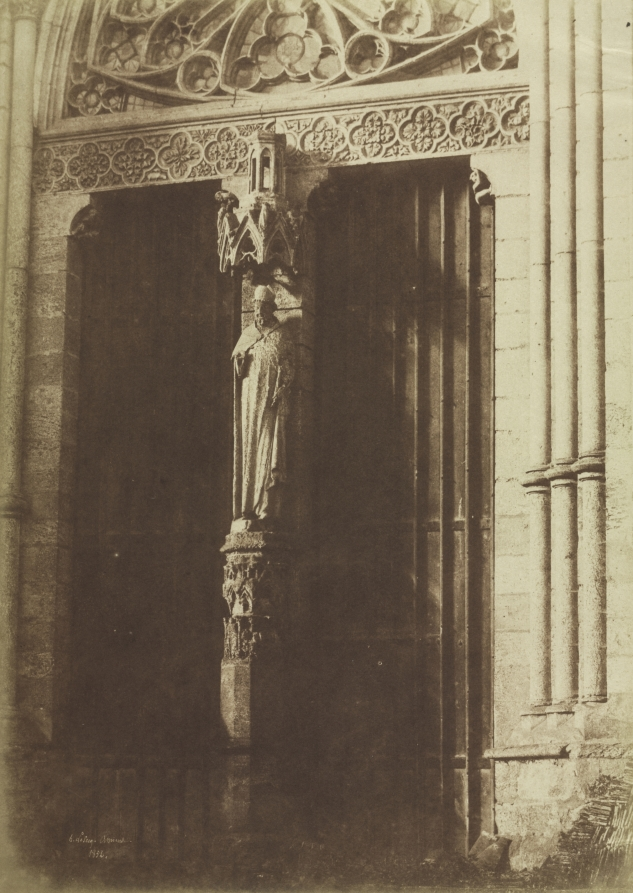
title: Amiens, Northern Façade of the Transept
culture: France, 19th century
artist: Henri Le Secq (French, 1818–1882)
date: 1852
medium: salted paper print from calotype negative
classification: Photograph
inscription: Written in negative: "H. LeSecq. Amiens. / 1852"; written in pencil on verso of mount: "n.°200N"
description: A pioneering French photographer, Le Secq is best known for his elaborate photographic studies of French architecture. His extensive photographic portrait of Amiens began in 1850 and continued for several years. This detail of the cathedral’s exterior beautifully describes his skill at expressively interpreting historic architecture. The photograph not only displays Le Secq’s preference and talent for isolating fragments of buildings, but even more impressively attests to his ability to capture the play of light and shade over stone sculpture. He deftly used raking light to infuse vitality and plasticity to the centrally positioned carved figure and the architectural elements surrounding it. The lowered frontal camera position stresses an order and formality that Le Secq believed was inherent in Gothic cathedrals.